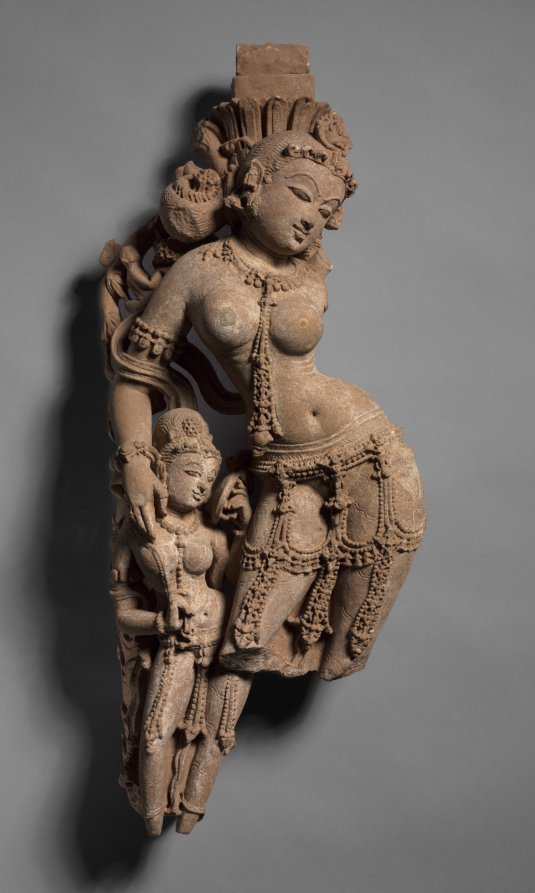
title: Female Tree Deity with Attendant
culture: Northwestern India, Rajasthan, Sikar, Harshagiri, 10th century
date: c. 973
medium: sandstone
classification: Sculpture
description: Memories of the nature divinities so important on the exterior of ancient Buddhist sites persist in female figures such as this on Hindu temples of the medieval period. Her form personifies fecundity, and the mango tree with which she is integrated bursts into the fruits that dangle down the side of the sculpture. Her attendant gazes into a mirror. This sculpture exemplifies the stylistic characteristics of the 900s, with the exaggerated thrust of her hip, and dense, crisply rendered areas of jewelry offset by smooth planes of flesh. Facial features are articulated with linear clarity and sharp outlines. These idealized female figures convey the notion of auspicious abundance and prosperity in the created world, which are benefits of worship and support of the temple.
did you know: There is a small monkey perched by the tree deity's shoulder.